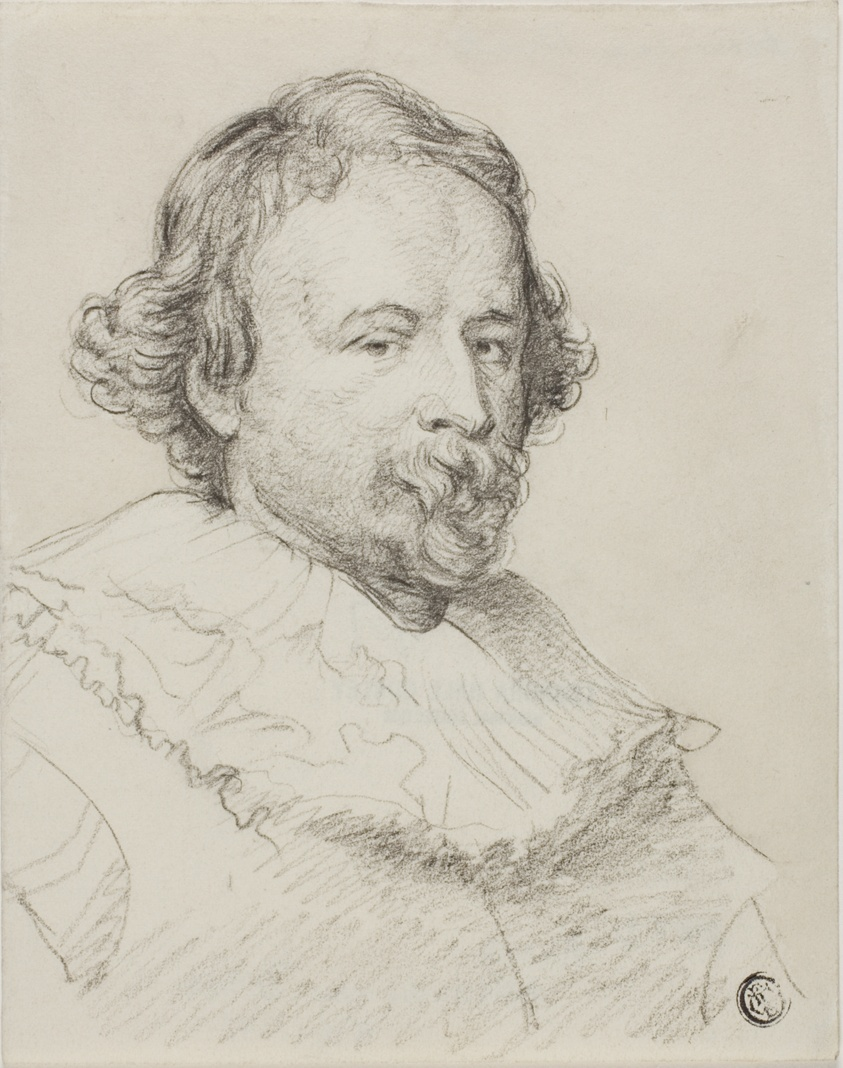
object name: Drawing and Watercolor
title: Jan Mildert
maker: After Anthony van Dyck; Flemish, 1599-1641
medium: Charcoal, with pale gray wash, on ivory wove paper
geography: Flanders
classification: chalk; drawings (visual works); prints and drawing